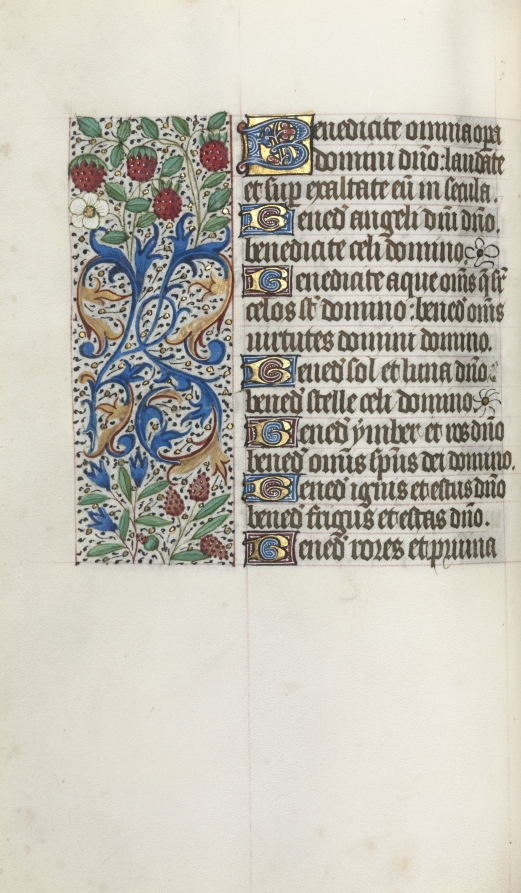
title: Book of Hours (Use of Rouen): fol. 41v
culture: France, Rouen, 15th century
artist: Master of the Geneva Latini (French, active Rouen, 1460–80)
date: c. 1470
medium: ink, tempera, and gold on vellum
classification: Bound Volume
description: In the late 1400s and early 1500s Rouen was an established and important center of book production. The city’s cathedral had a wealthy chapter that spent large sums of money to commission books and to maintain its extensive library. The stationers and booksellers would have likely been concentrated in or near the cathedral precinct. This artist, named after a manuscript now in Geneva, was Rouen’s principal illuminator during the second half of the 1400s.